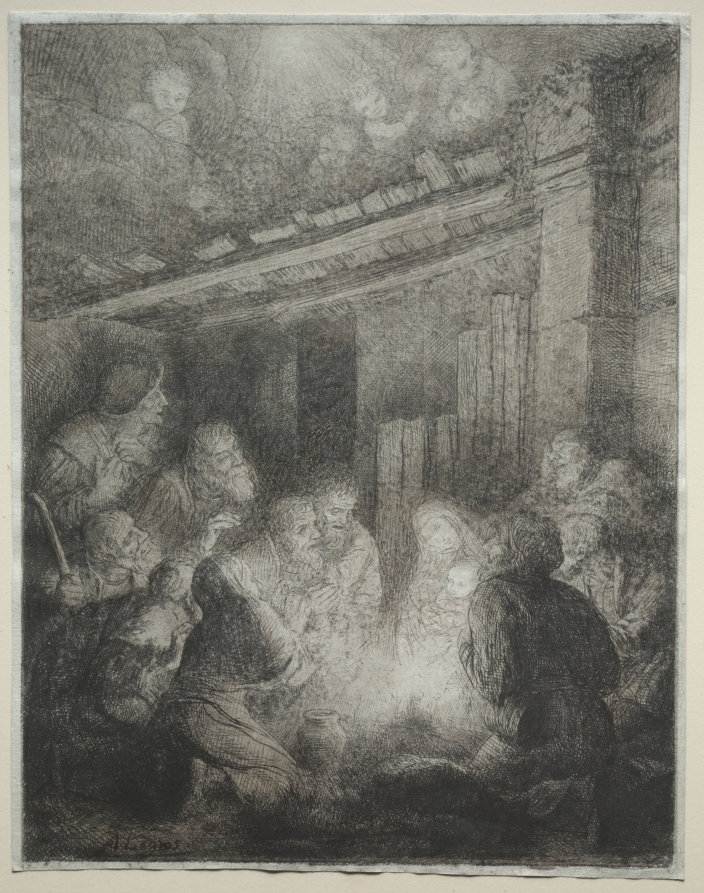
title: Adoration of the Shepherds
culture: France, 19th-20th century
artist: Alphonse Legros (French, 1837–1911)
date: c. 1857–1911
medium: etching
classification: Print